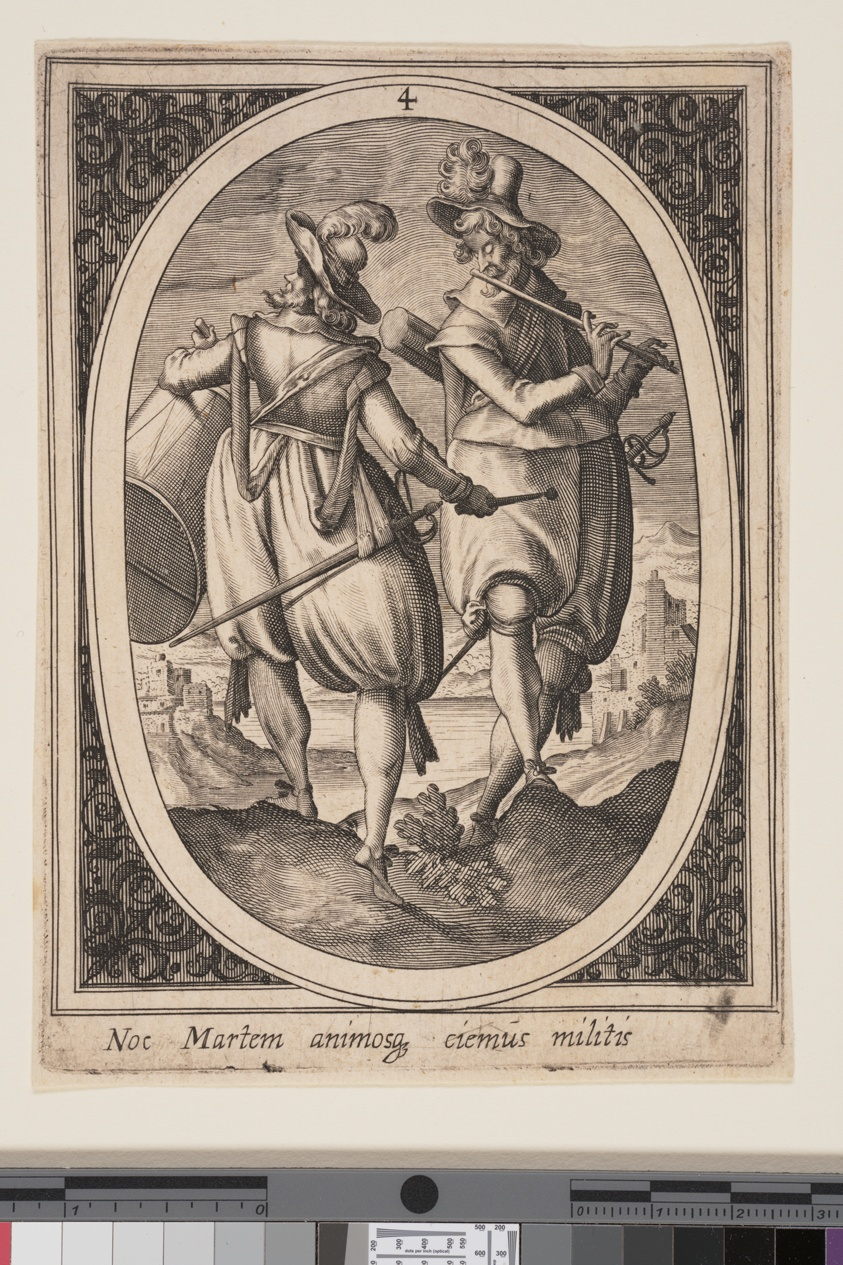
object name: Print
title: Plate 4 from Military Figures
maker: Attriuted to Heinrich Ulrich (German, c. 1572-1621); possibly after Paul Mair (German, active c. 1600)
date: c. 1590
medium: Engraving on ivory laid paper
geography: Germany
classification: engraving; paper; print; prints and drawing